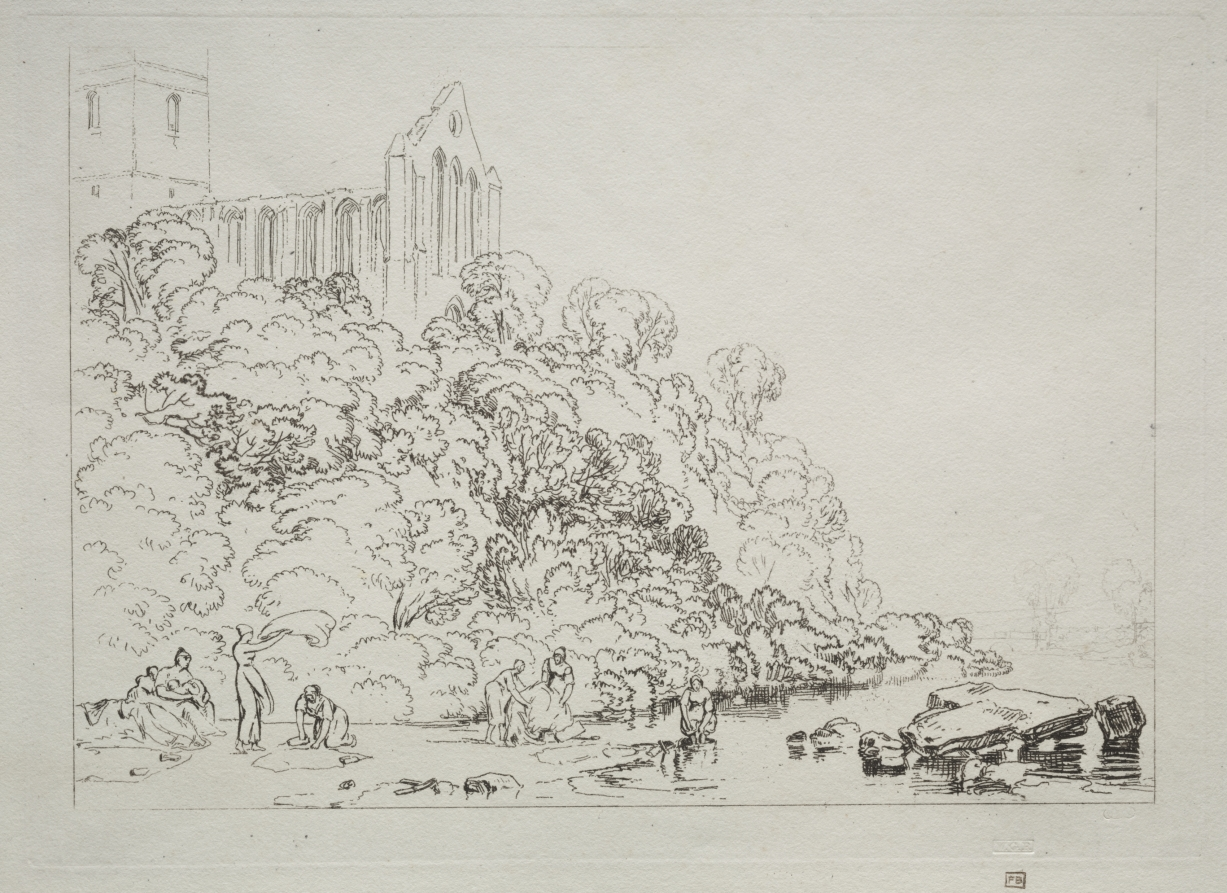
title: Liber Studiorum: Dumblain Abbey, Scotland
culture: England, 19th century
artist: Joseph Mallord William Turner (British, 1775–1851)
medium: etching and mezzotint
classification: Print